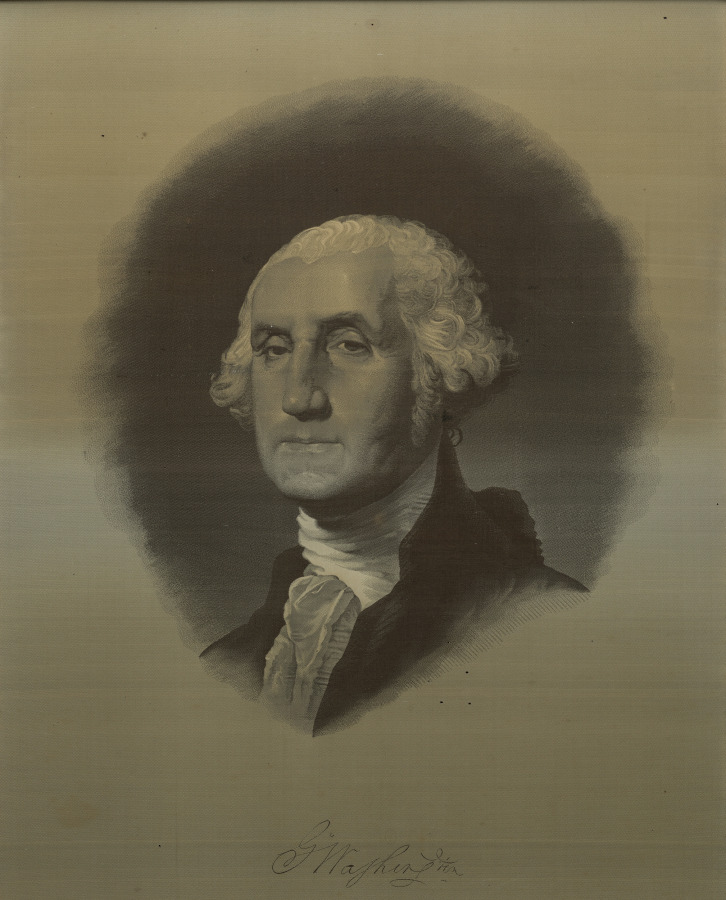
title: George Washington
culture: France, Lyon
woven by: Carquillat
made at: Maison Mathevon and Bouvard (French)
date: 1854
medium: silk, jacquard weave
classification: Textile